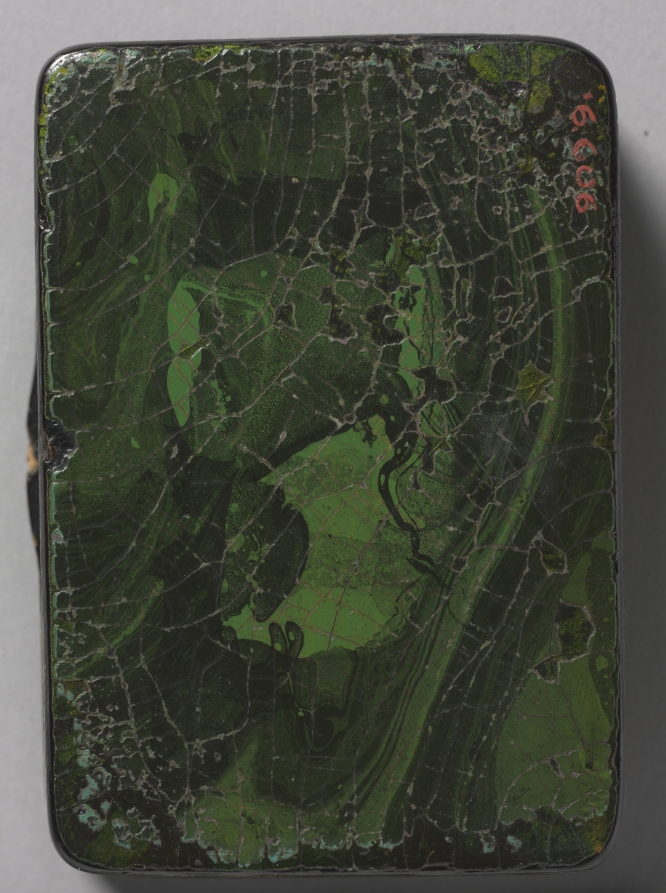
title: Box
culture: Russia, possibly Korobov Factory, early 19th century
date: c. 1815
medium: lacquered wood with painted miniature under glass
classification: Miscellaneous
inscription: Cyrillic inscriptions around miniature portraits, included in the inscriptions are the dates "1812" and "1815."